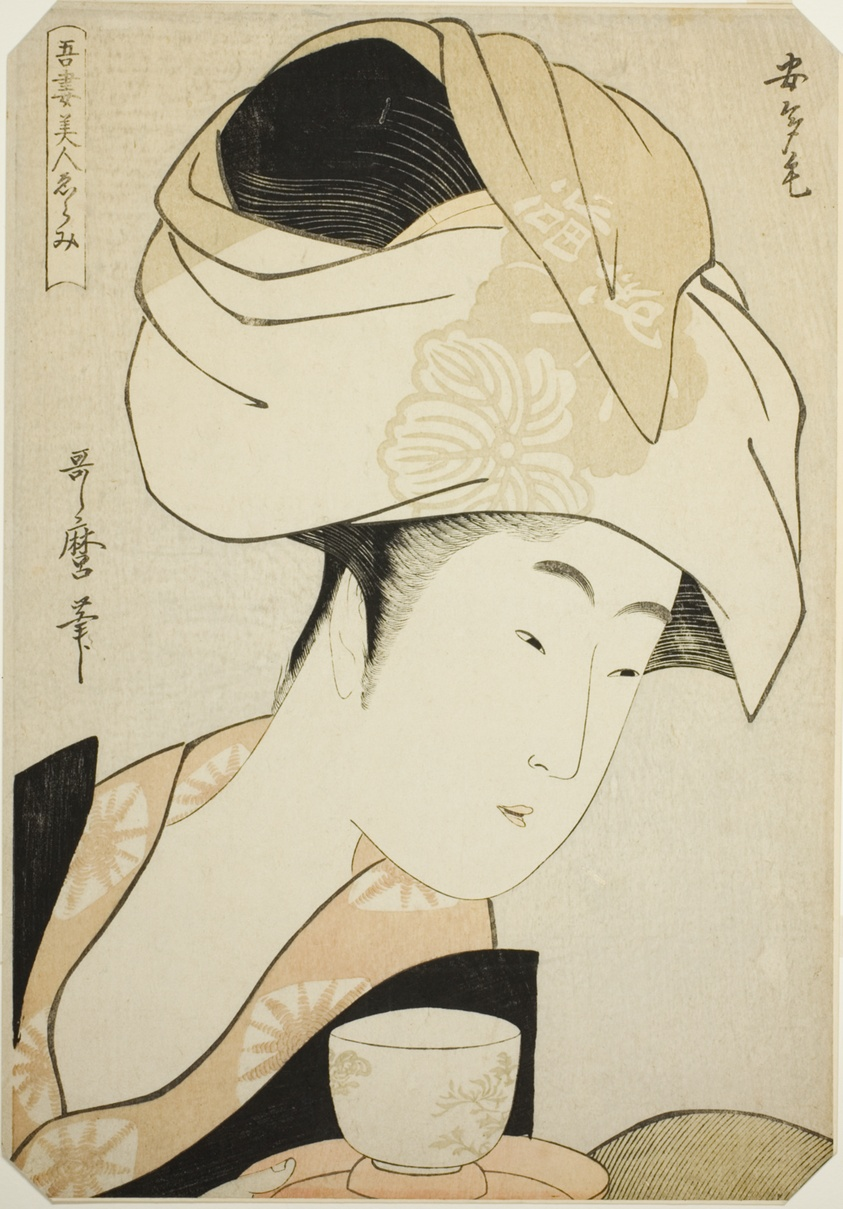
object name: Print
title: Atage, from the series "A Selection of Eastern Beauties (Azuma bijin erami)"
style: Japanese (culture or style)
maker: Kitagawa Utamaro 喜多川 歌麿; Japanese, 1753 (?)-1806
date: c. 1798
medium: Color woodblock print; aiban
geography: Japan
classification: woodblock print; print; asian art